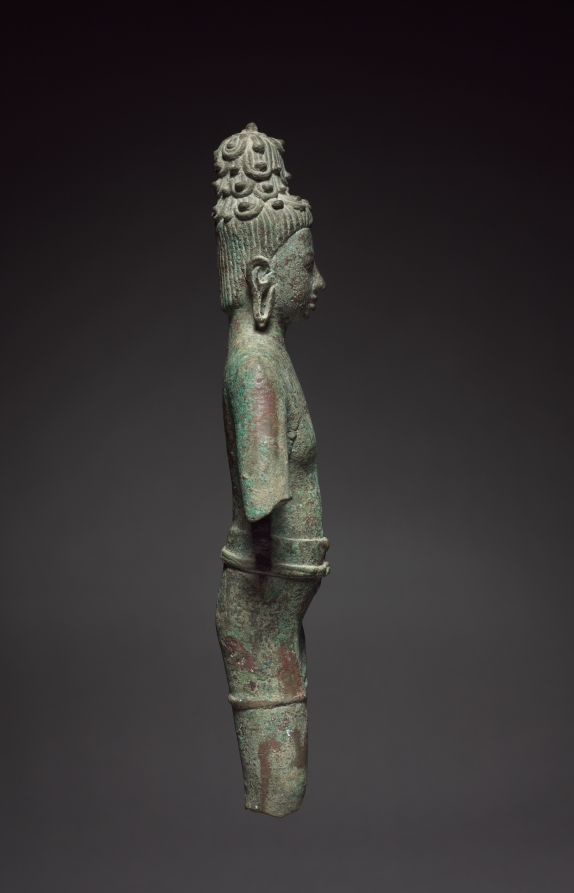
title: Bodhisattva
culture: Northeastern Thailand, Khorat Plateau, Buriram Province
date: 700s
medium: bronze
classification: Sculpture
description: This rare image survives from the early phase of Buddhist sculpture in Southeast Asia. Made in what is known as the Pra Khon Chai style, it has the characteristic sensitive expression, slender physique, and looped locks of hair. The broken limbs reveal the clay core over which the bronze was cast using the lost-wax method.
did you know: This sculputre was reportedly found as part of a group, some of which are much larger in scale.